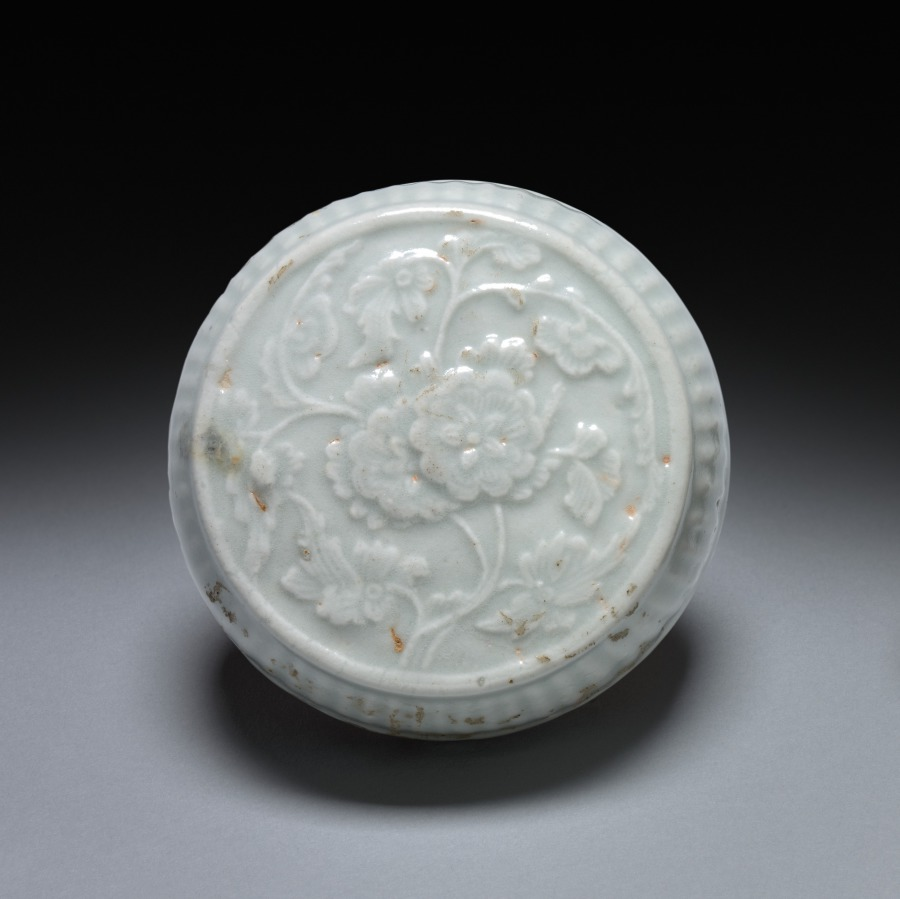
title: Circular Box: Qingbai Ware (lid)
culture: China, Southern Song Dynasty (1127-1279) - Yuan Dynasty (1271-1368)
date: 1200s-1300s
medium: glazed porcelain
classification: Ceramic